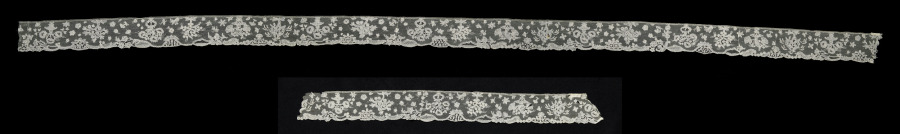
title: Lace Edging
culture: Belgium, Brussels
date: 1740–60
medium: Bobbin Lace (Point d'Angleterre)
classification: Lace